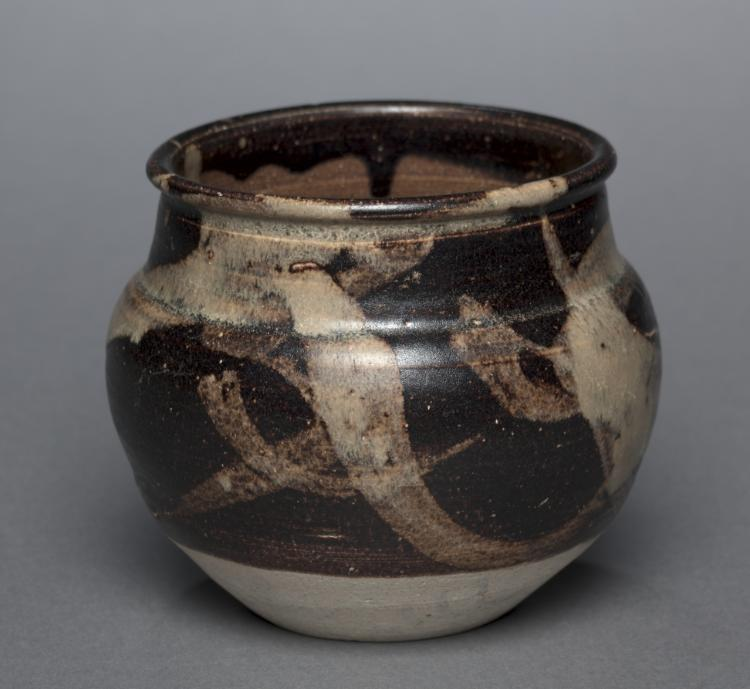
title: Jar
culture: China, Jiangxi province, Jizhou kilns, Southern Song Dynasty (1127–1279) - Yuan Dynasty (1271–1368)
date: 1200s–1300s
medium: Glazed stoneware with resist and slip-painted decoration, Jizhou ware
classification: Ceramic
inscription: jen ch'en nien san yüeh shih jih mai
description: Like the Teabowl with Tortoiseshell Glaze (CMA 2020.177), this jar was made in the Jizhou kilns of southeast China. Producing a variety of innovative dark glaze types, the potter here created a dynamic abstract pattern of waves in the form of light brown strokes brushed over a dark brown glaze.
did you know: To create leaf imprints in Jizhou ware, artisans dipped real leaves in glaze and placed them on vessels, where the leaves would then burn away while firing in the kiln.